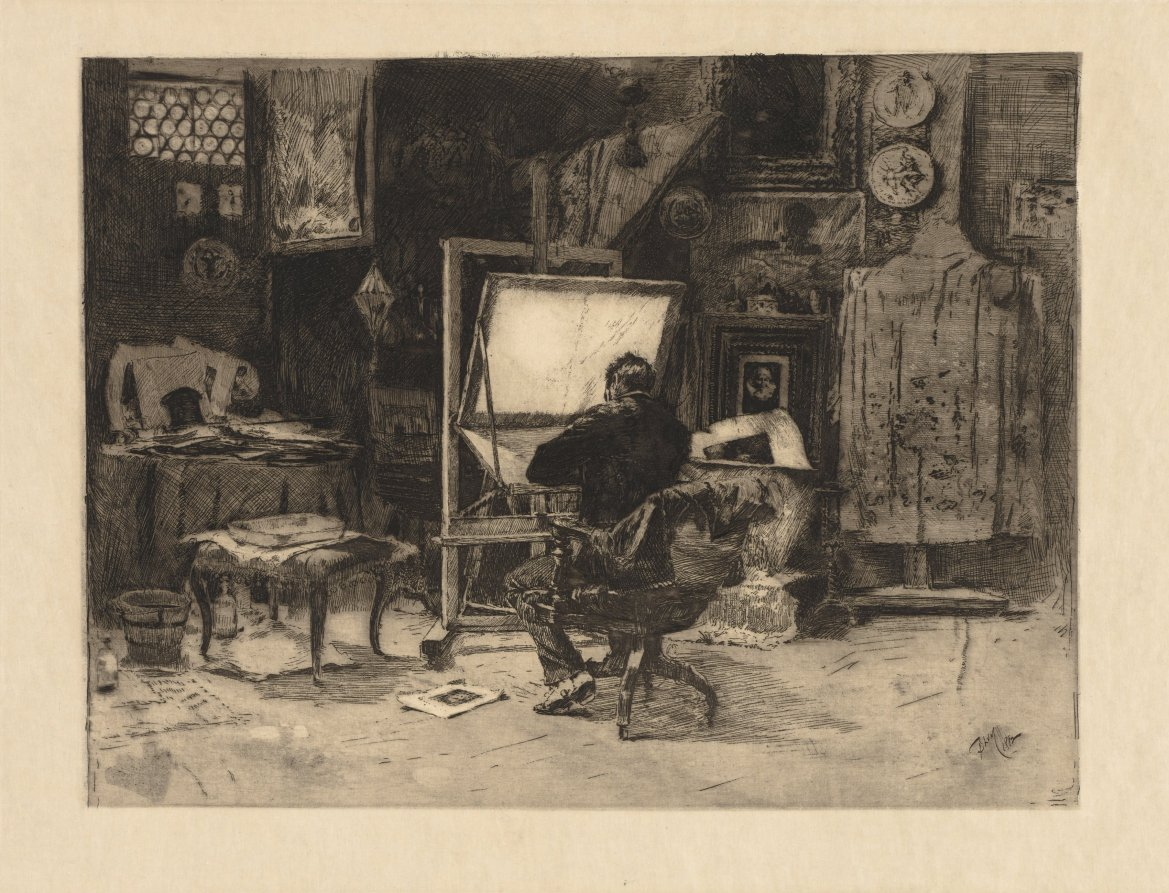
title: The Etcher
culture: America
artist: Robert Frederick Blum (American, 1857–1903)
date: 1882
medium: etching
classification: Print